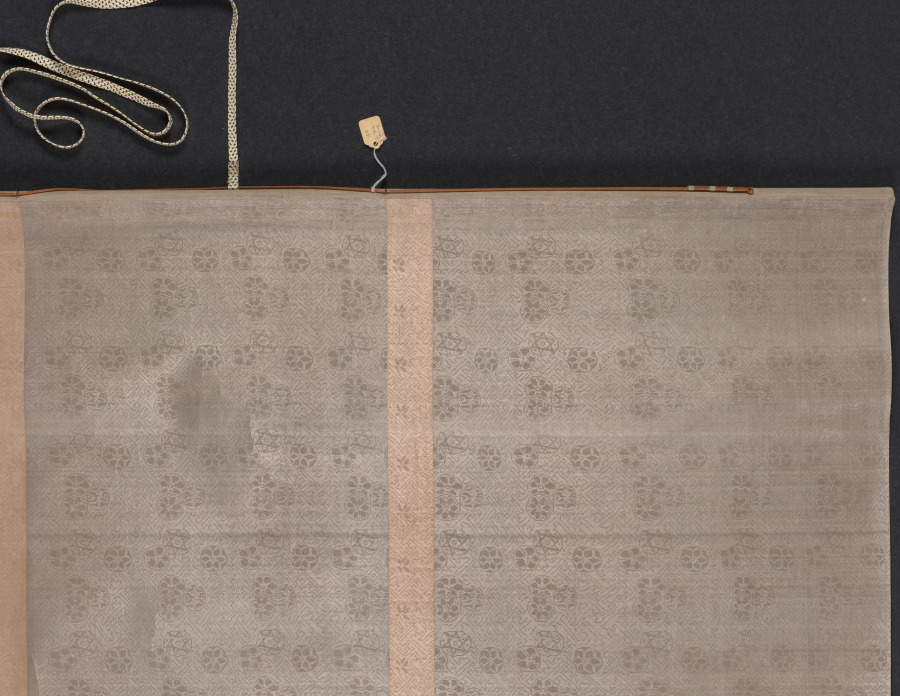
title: Old Trees by a Cool Spring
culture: China, Yuan dynasty (1271-1368)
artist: Li Shixing (Chinese, 1283–1328)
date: 1326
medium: hanging scroll; ink on silk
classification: Painting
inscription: 泰定丙寅年冬十二月薊丘李士行遵道作。[印] 李士行印; 李氏遵道; 遊戲翰墨.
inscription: 薊丘李侯能畫松，蟠根錯節騰蛟龍。 枯梢削鐵歲月古，細葉當風紫翠重。 昔人曾入子固夢，此株豈為秦官封。 畢宏韋偃偕已矣，請公放筆吾將從。 華溪九十翁沈夢麟書 蘊中上人題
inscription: [印] 明善堂所見書畫印記; [印] 怡親王寶